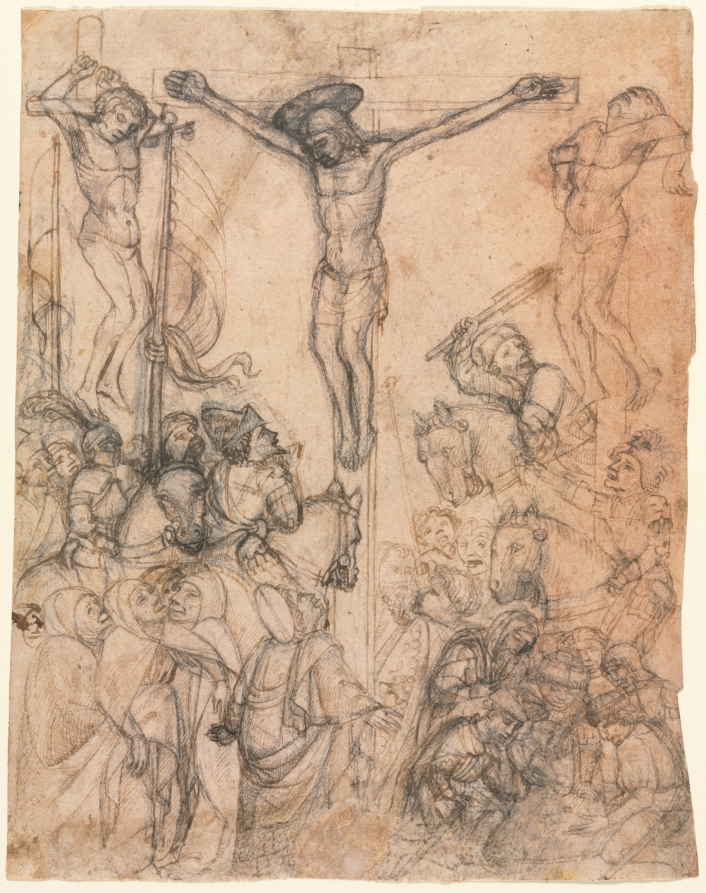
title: Crucifixion with the Two Thieves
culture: Italy, Piedmontese, 15th century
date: second half 15th century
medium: pen and brown ink and black chalk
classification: Drawing